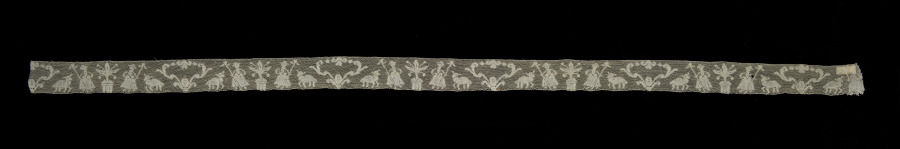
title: Lace Edging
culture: France, Valenciennes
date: 1700s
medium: Linen: bobbin lace (Valenciennes)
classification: Lace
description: This lace edging depicts shepherdesses, lambs, and flowering plants.